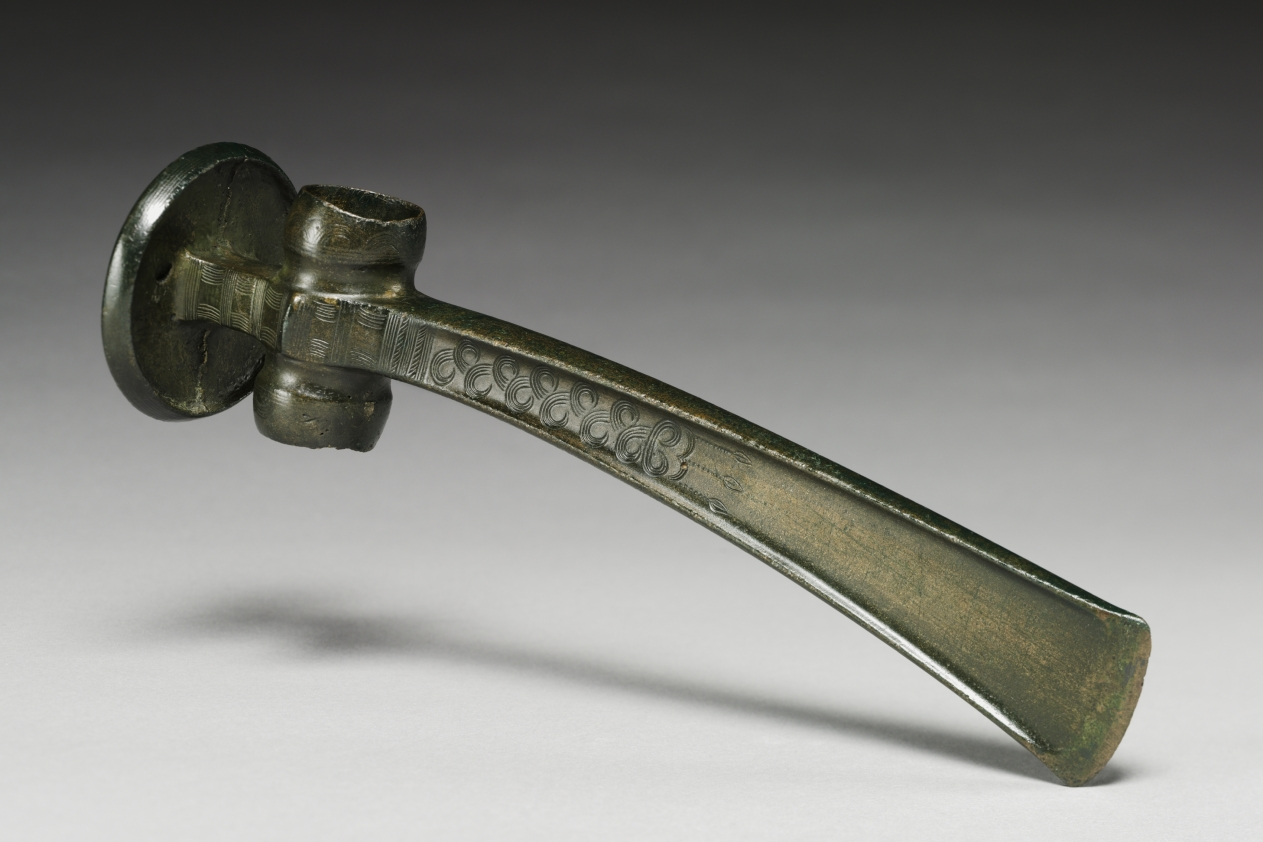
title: Battle Axe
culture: Hungary, Bronze Age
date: c. 1500 BCE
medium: bronze, solid-cast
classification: Metalwork